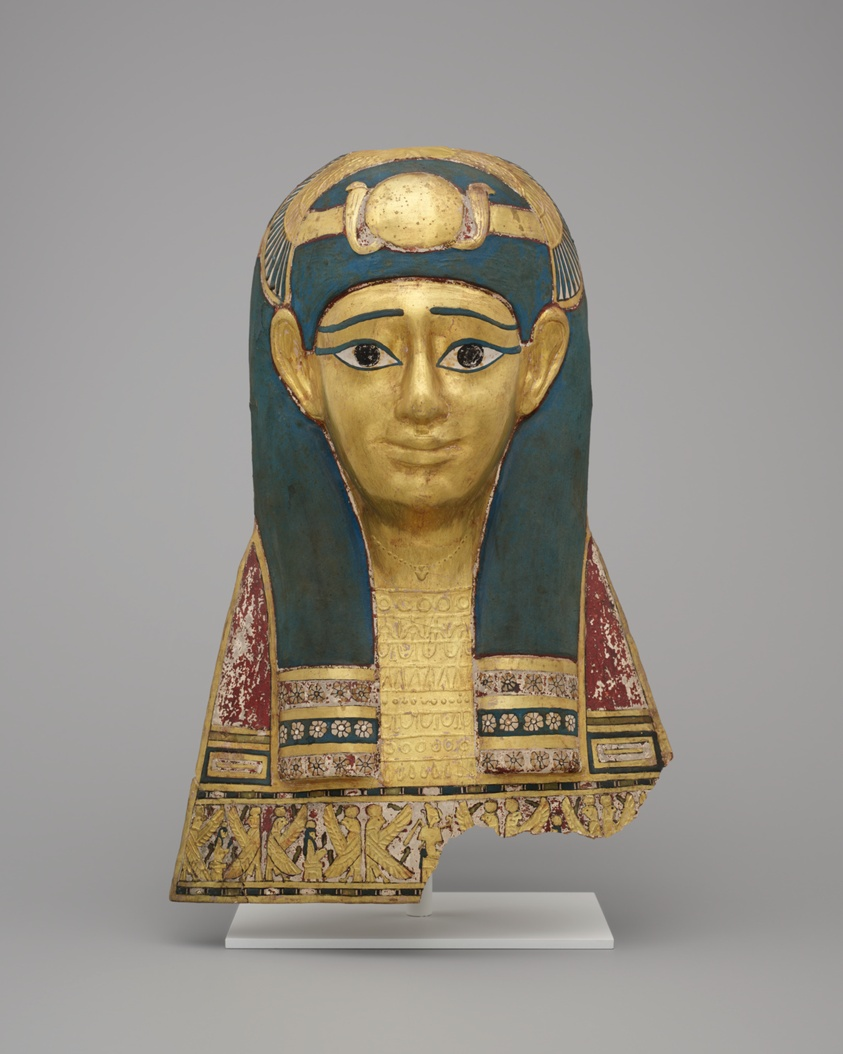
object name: Funerary Object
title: Funerary Mask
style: egyptian, ancient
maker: Egyptian; probably from Hawara, Egypt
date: Late Ptolemaic Period-early Roman Period, 1st century BCE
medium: Cartonnage, gold leaf, and pigment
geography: Egypt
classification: mummy goods; mummy masks; mummy portraits; ancient art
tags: masks